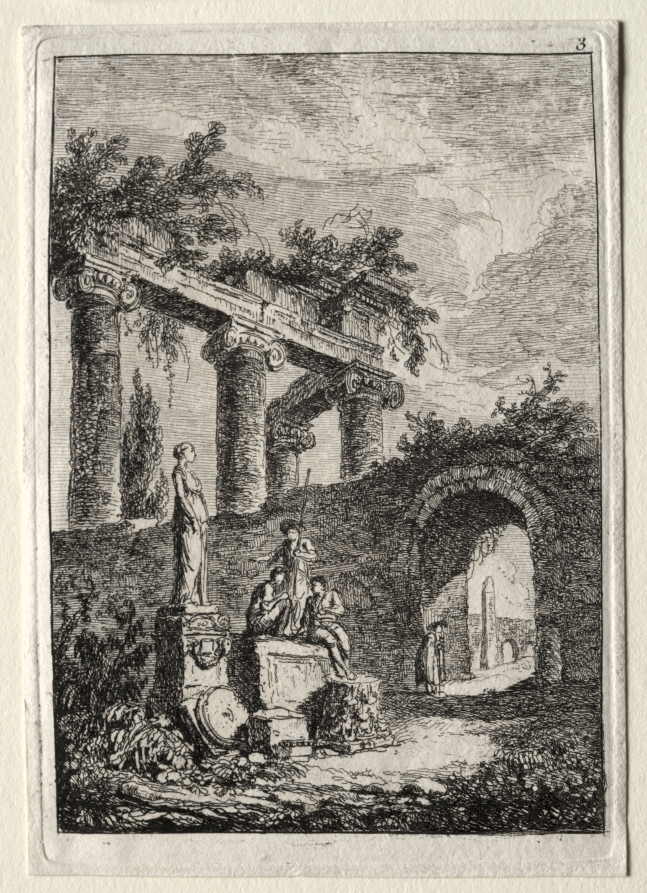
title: The Statue in Front of Ruins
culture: France, 18th century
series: Evenings in Rome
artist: Hubert Robert (French, 1733–1808)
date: 1763–64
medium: etching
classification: Print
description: Derived from his own pen-and-ink drawings, this suite of etchings features fictional characters situated near recognizable buildings and statues in Rome. On the title page, Robert dedicated the suite to Marguerite Le Compte, who visited Rome in 1764 in the company of the wealthy author and art enthusiast Claude Henri Watelet. Both Le Compte and Watelet were amateur etchers, and they socialized with a group that included artists and printmakers centered at the academies in Italy. Robert’s dedication was likely motivated by the hope of future patronage from Le Compte. She may be the generous woman with a hand muff depicted in The Ancient Temple, the fifth scene in this series.